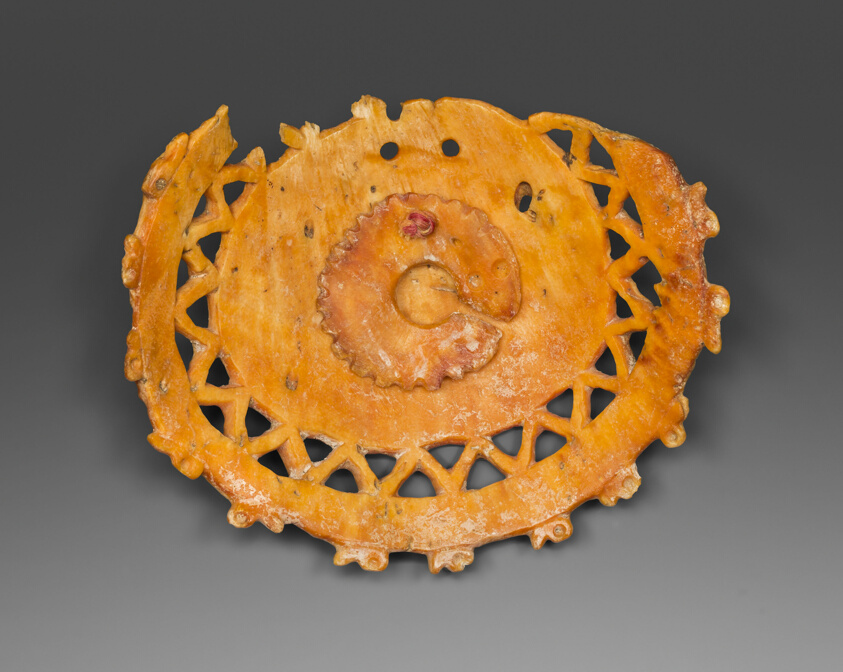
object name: Costume and Accessories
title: Circular Pendant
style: colima, mesoamerican, Pre-Columbian, americas, jalisco, west mexico, Arts of the Americas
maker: Colima or Jalisco; Colima or Jalisco, Mexico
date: 200 BCE–200 CE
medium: Spondylus shell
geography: Western Mexico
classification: pendant (jewelry); shell; art of the americas; jewelry; costume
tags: jewelry, birds, water, shells